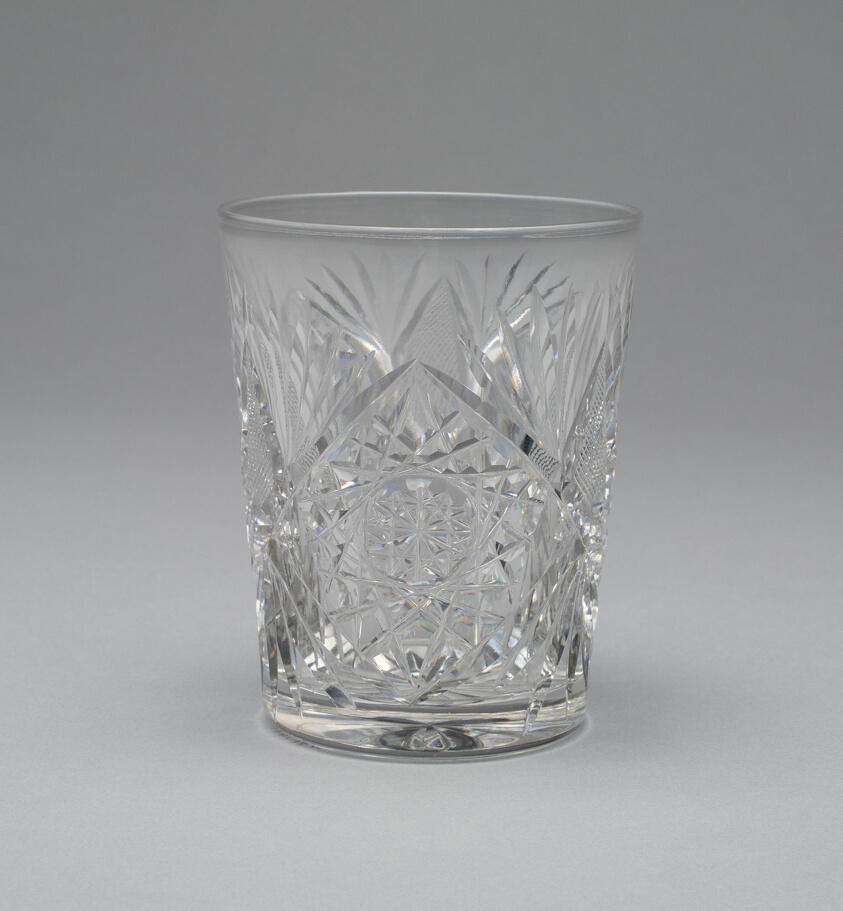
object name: Glass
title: Tumbler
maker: Artist unknown (American, 20th century)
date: 1902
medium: Cut glass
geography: United States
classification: drinking vessel; glass; american decorative arts; american arts; decorative arts